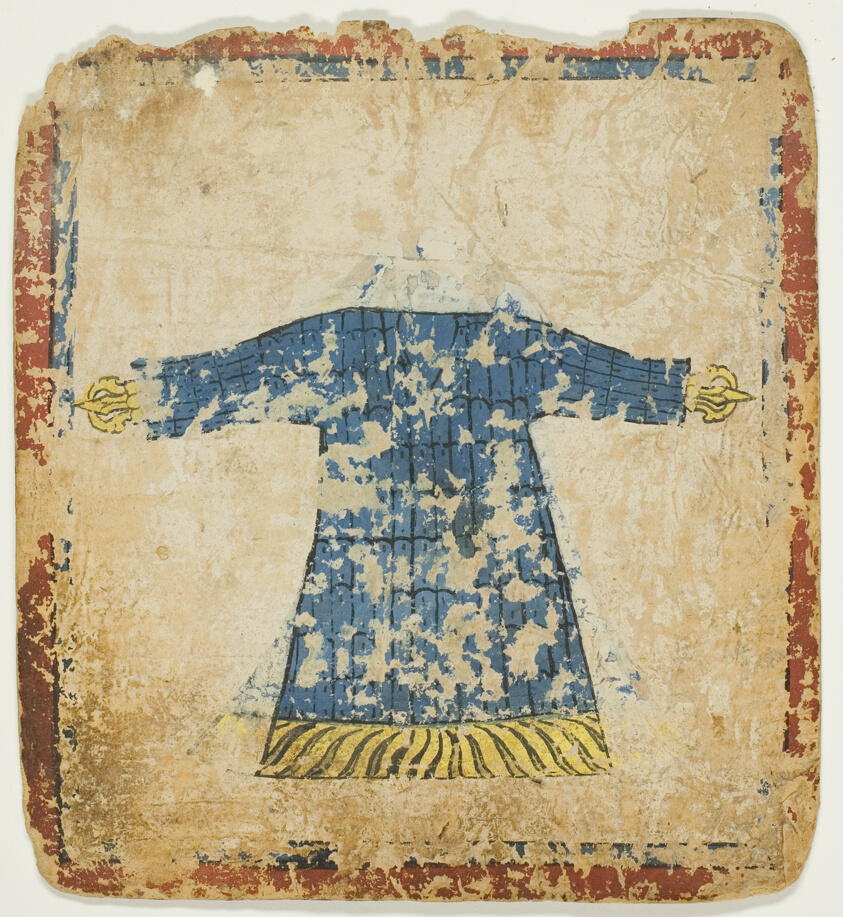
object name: Painting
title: Armor Shirt, from a Set of Initiation Cards (Tsakali)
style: Himalayan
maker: Southern Tibet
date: 14th/15th century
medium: Ink and watercolor on paper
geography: Tibet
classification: ink; painting